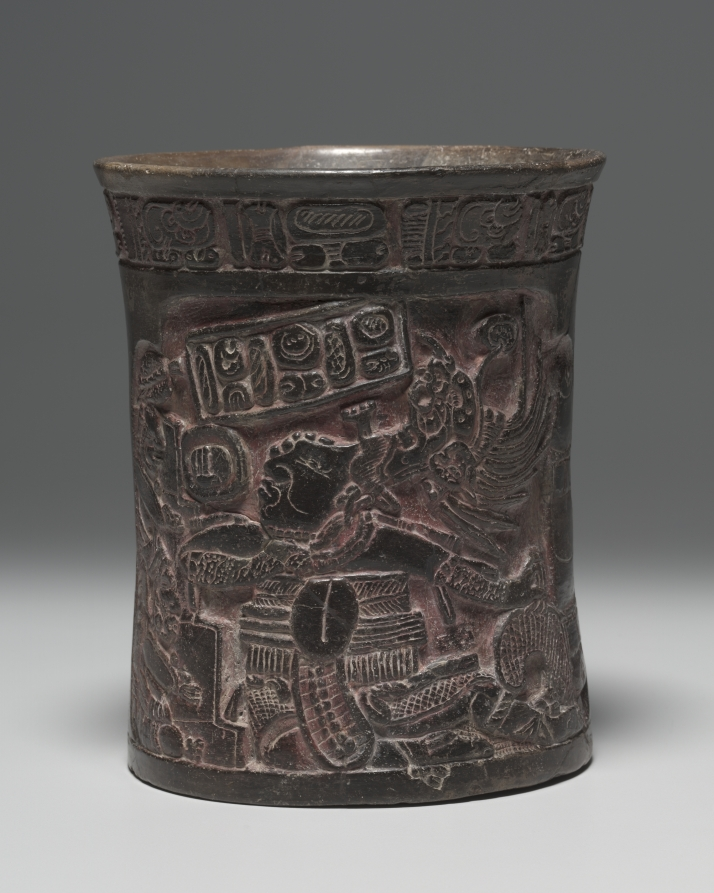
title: Vessel with Ballplayer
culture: Mexico, Yucatán, Maya (Chocholá) style (250-900)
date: c. 600–1000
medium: earthenware, pigment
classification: Ceramic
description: Many Mesoamerican people played ball games, using their hips rather than hands and feet to keep the heavy, solid rubber ball in play. Here a Maya ballplayer, wearing a thick protector to shield his torso from injury, dives to intercept the ball, which hovers in front of his face. The scene is situated within stepped walls, probably those of a ball court.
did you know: This vessel was once broken into 34 pieces before being repaired.